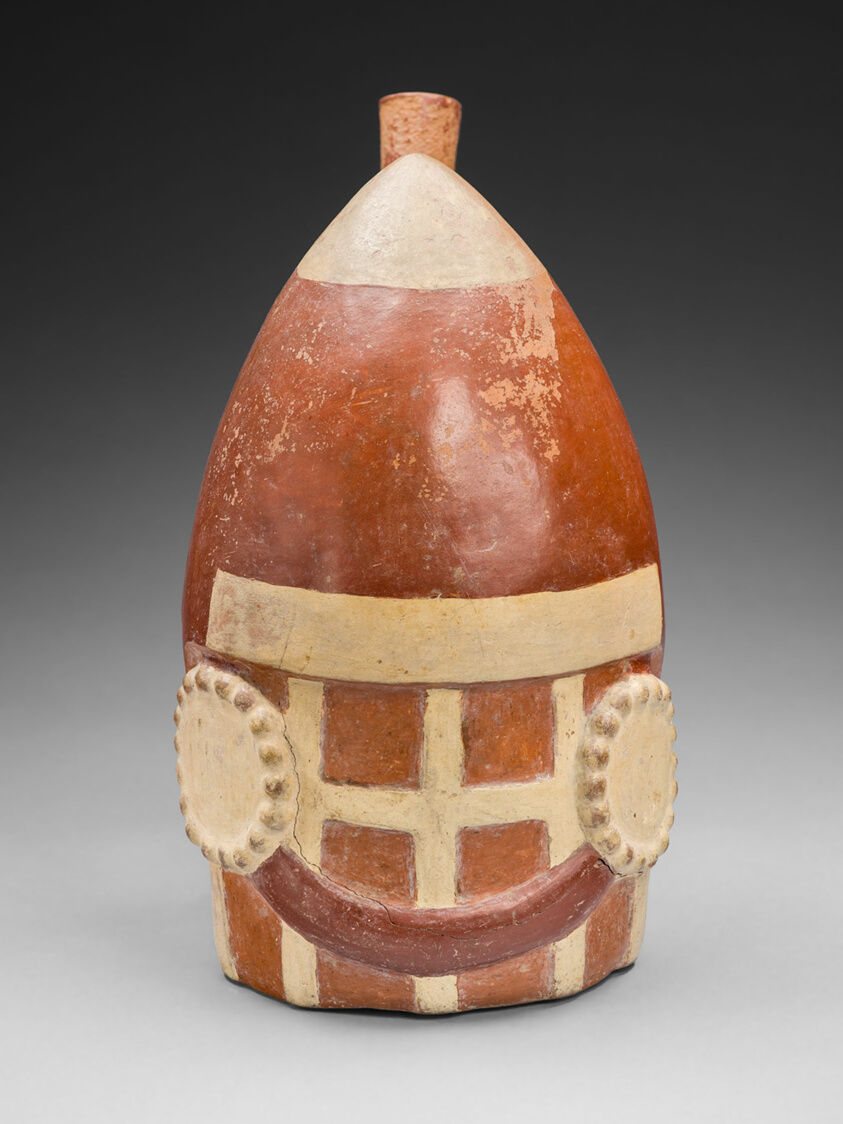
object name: Vessel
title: Vessel in the Form of a Warrior's Helmet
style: moche, mochica iii, mochica, early intermediate period, Pre-Columbian, americas, Arts of the Americas, andean, andes, south american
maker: Moche (North coast, Peru)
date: 100 BCE–500 CE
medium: Ceramic and pigment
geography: Peruvian North Coast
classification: earthenware; ceramics; vessel; art of the americas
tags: warriors, warefare